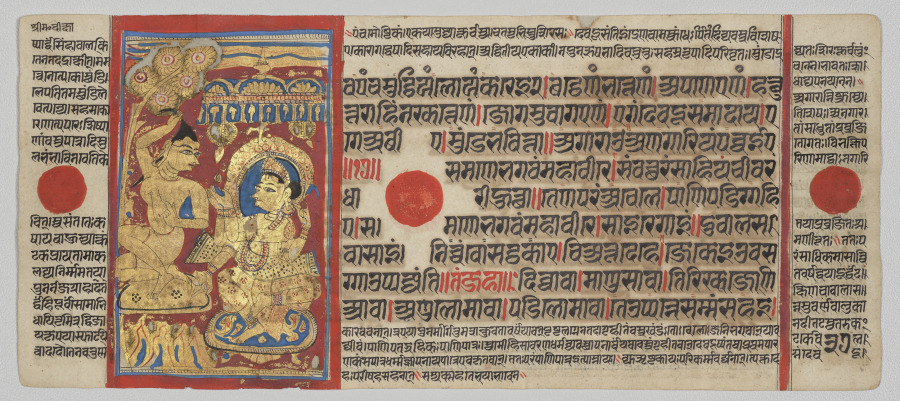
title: Mahavira's Initiation Tonsure, Folio 37 (verso), from a Kalpa-sutra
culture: Western India, Gujarat, last quarter of the 15th century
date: c. 1475–1500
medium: Gum tempera, ink, and gold on paper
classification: Painting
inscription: [[upper left]] Śrī Ma* dīkśā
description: When Mahavira chose to renounce his life as a prince to seek omniscience and ultimate liberation, he traveled from his palace to the countryside until he came to a wooded park. The text states that under an ashoka tree in the park, Mahavira removed his ornaments and garlands and plucked out his hair with his fists in five handfuls. In the illumination he unflinchingly grasps a fistful of hair, his pectoral muscle flexed with the effort. Indra, the four-armed king of the gods, sits under a royal canopy on a lower level than Mahavira and praises his extreme act of self-mortification. The dramatic moment is effectively conveyed through the pert and wiry line drawing and bold palette of pigments made from lapis lazuli, vermilion, and lavish amounts of gold.